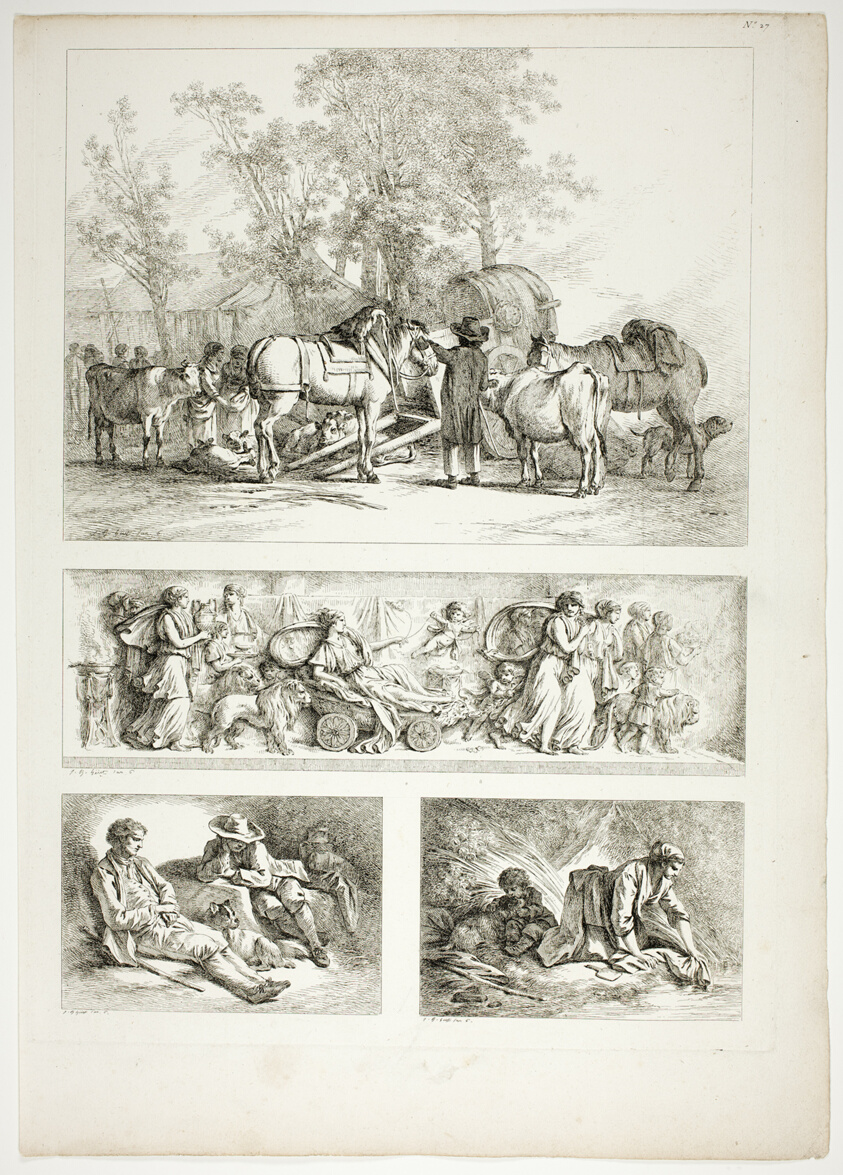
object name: Print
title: Plate 27 of 38 from Oeuvres de J. B. Huet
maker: Jean Baptiste Huet (French, 1745-1811)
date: 1796–99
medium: Etching on paper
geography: France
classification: etching; print; prints and drawing